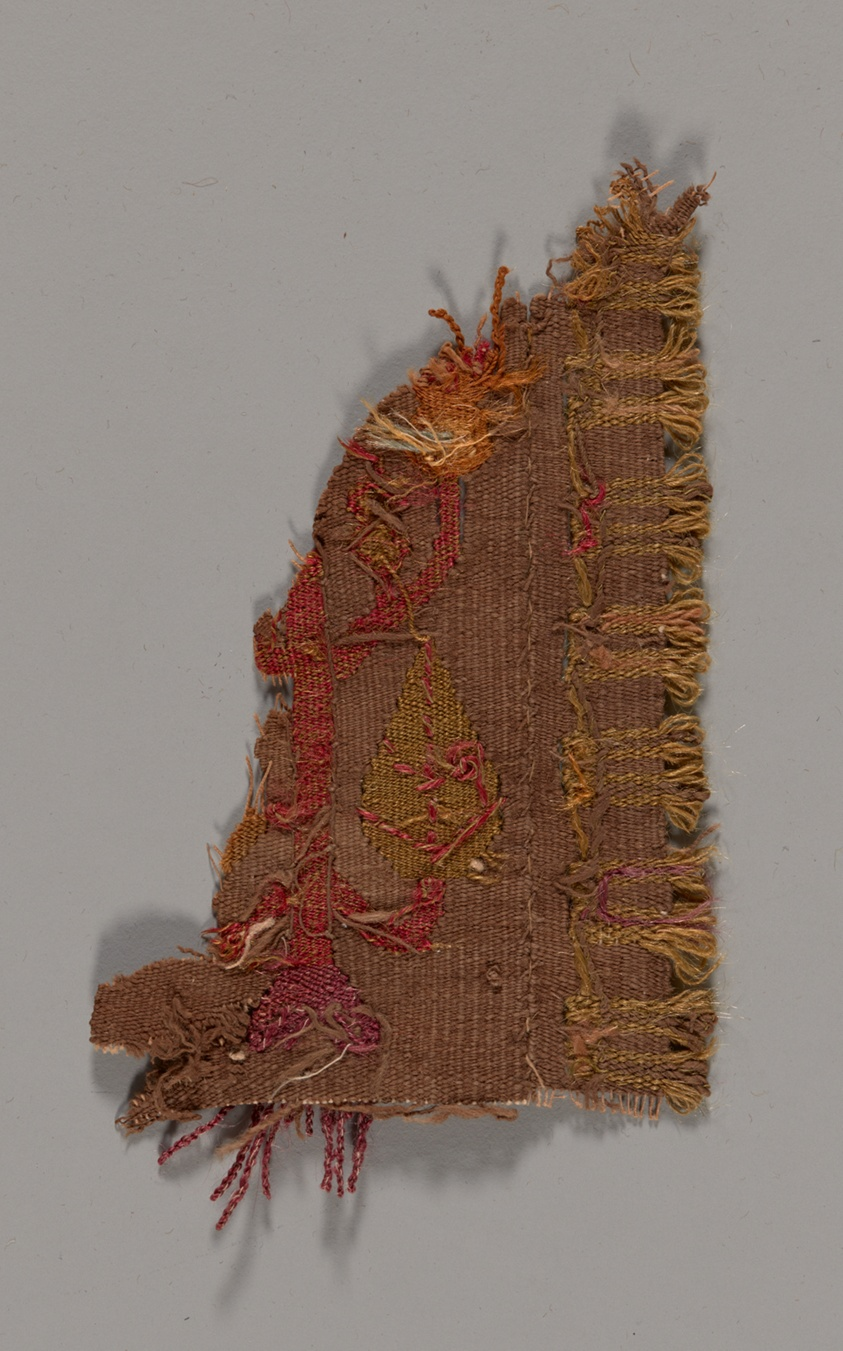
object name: Textile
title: Band Fragments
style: lambayeque, Pre-Columbian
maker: Lambayeque (North coast, Peru)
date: 1000/1476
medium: Cotton and wool (camelid), slit tapestry weave with eccentric wefts, uncut weft loop pile, extended uncut looped and plied weft fringes; embroidered with cotton and wool (camelid) with laid-in couching; and selvage weft loop fringe; three segments joined by overcast couching stitch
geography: Peru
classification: textile; weaving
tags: super/natural